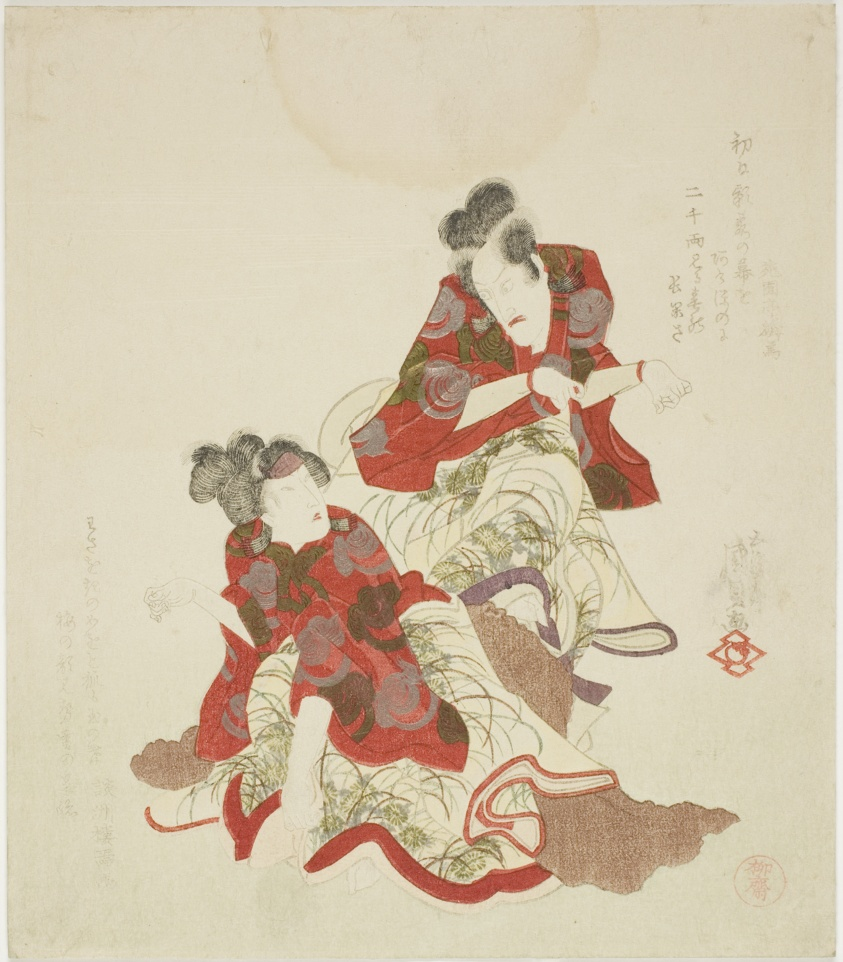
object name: Print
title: The actors Ichikawa Danjuro VII as Takamoto no kitsune and Segawa Kikunojo V as Izumi no Chieda-gitsune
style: Japanese (culture or style)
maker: Utagawa Kunisada I (Toyokuni III) (Japanese, 1786-1864)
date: 1818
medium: Color woodblock print; shikishiban, surimono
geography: Japan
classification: woodblock print; print; asian art